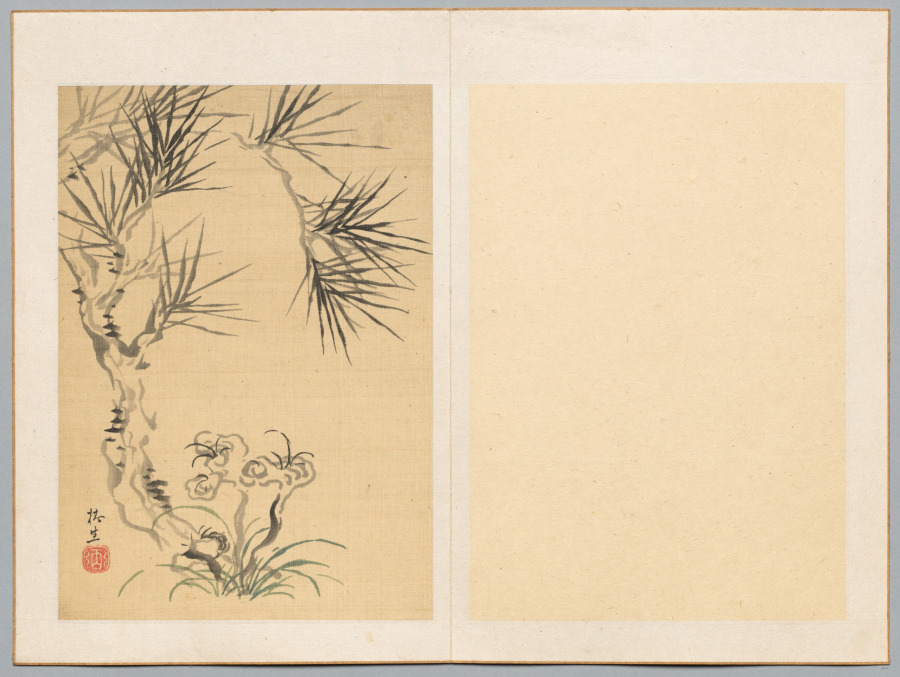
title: Pine Tree and Fungus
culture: Japan, Edo period (1615–1868)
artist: Tsubaki Chinzan (Japanese, 1801–1854)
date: early to mid-1800s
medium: leaf from a pair of folding albums; ink and light color on paper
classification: Portfolio